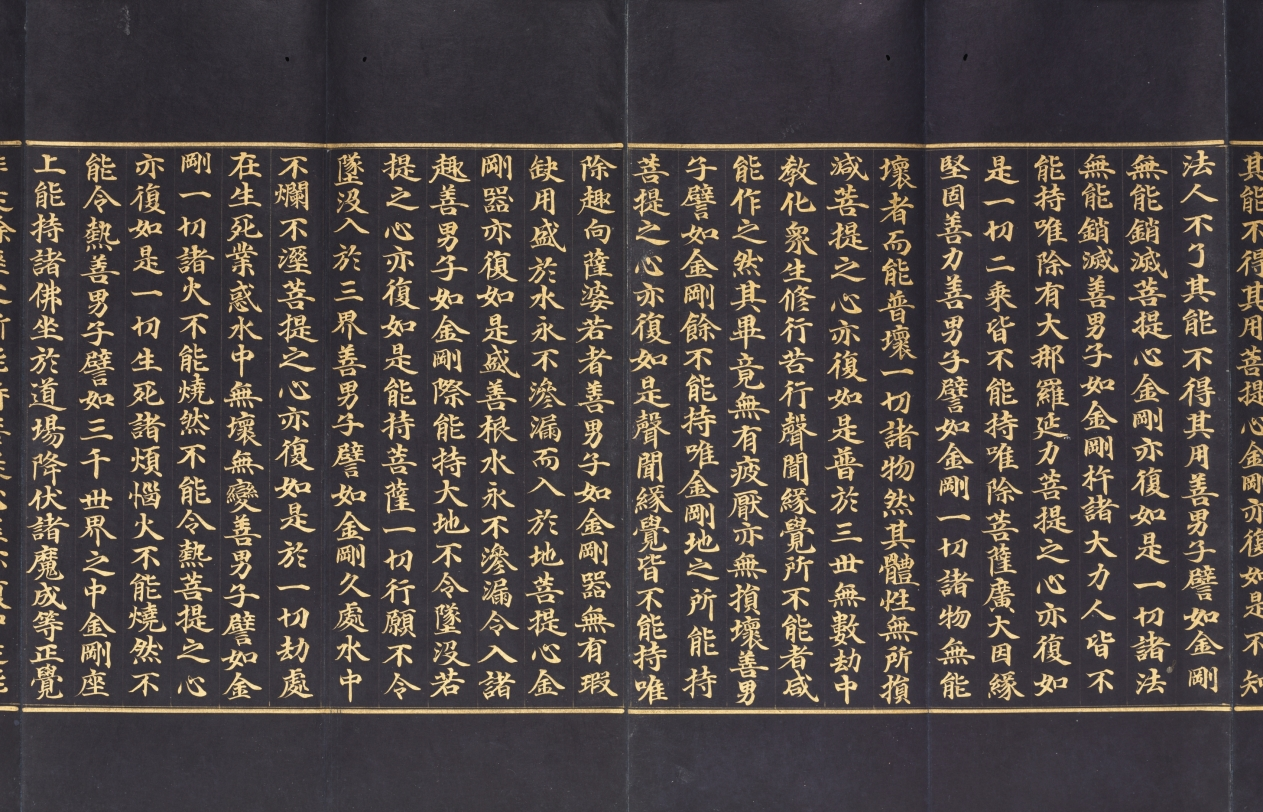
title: Avatamsaka Sutra No. 78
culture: Korea, Goryeo dynasty (918–1392)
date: 1300s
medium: Folded book with illustrated frontispiece; gold and silver on mulberry paper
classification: Bound Volume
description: This illuminated manuscript presents one part of the multivolume sacred text titled Avatamsaka (Flower Garland) sutra. Both the script and the image are rendered in gold ink on the smooth surface of the dark blue, indigo-dyed mulberry paper. This portion of the text, which reads from right to left, describes the encounter of the Buddha of the Future (Maitreya) and the young pilgrim Sudhana. The Buddha gives his words of wisdom to Sudhana, who asks questions about the path toward spiritual awakening. Mixed with ink and glue, the gold has a brilliance that strikingly reflects Sudhana’s ardent quest for understanding the way to reach enlightenment.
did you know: The pristine condition of this manuscript indicates that it was rarely used after its creation, revealing that the act of making a manuscript rather than reading it was the main religious goal.